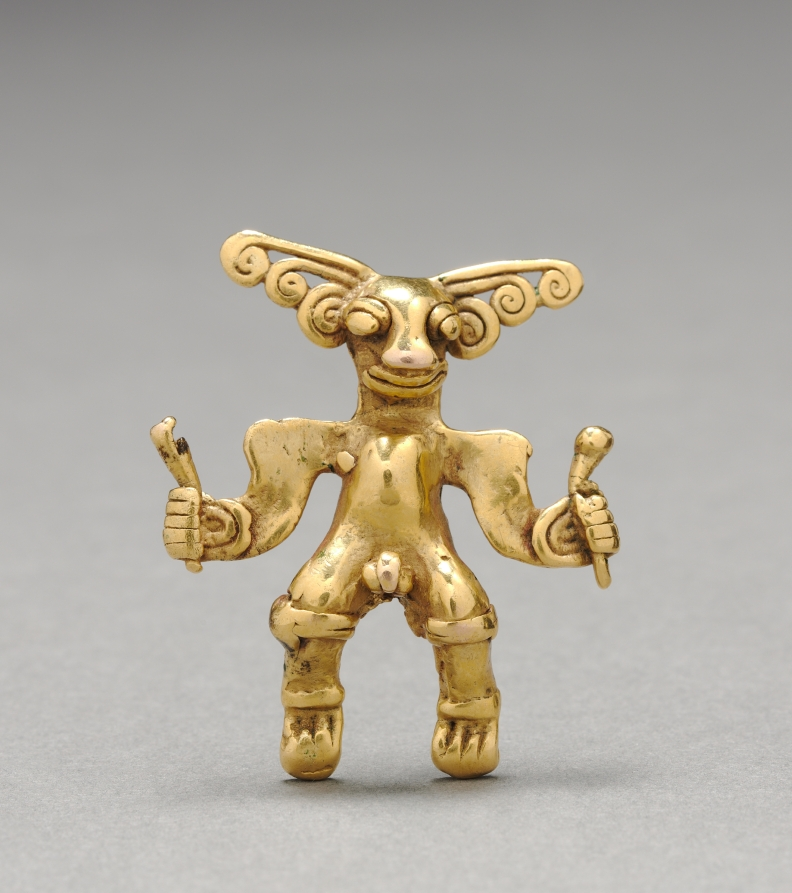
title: Figurine Pendant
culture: Western Panama, or Diquís, Costa Rica, Veraguas-Gran Chiriquí or Diquís Style, 11th-16th century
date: c. 1000–1550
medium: cast gold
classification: Metalwork